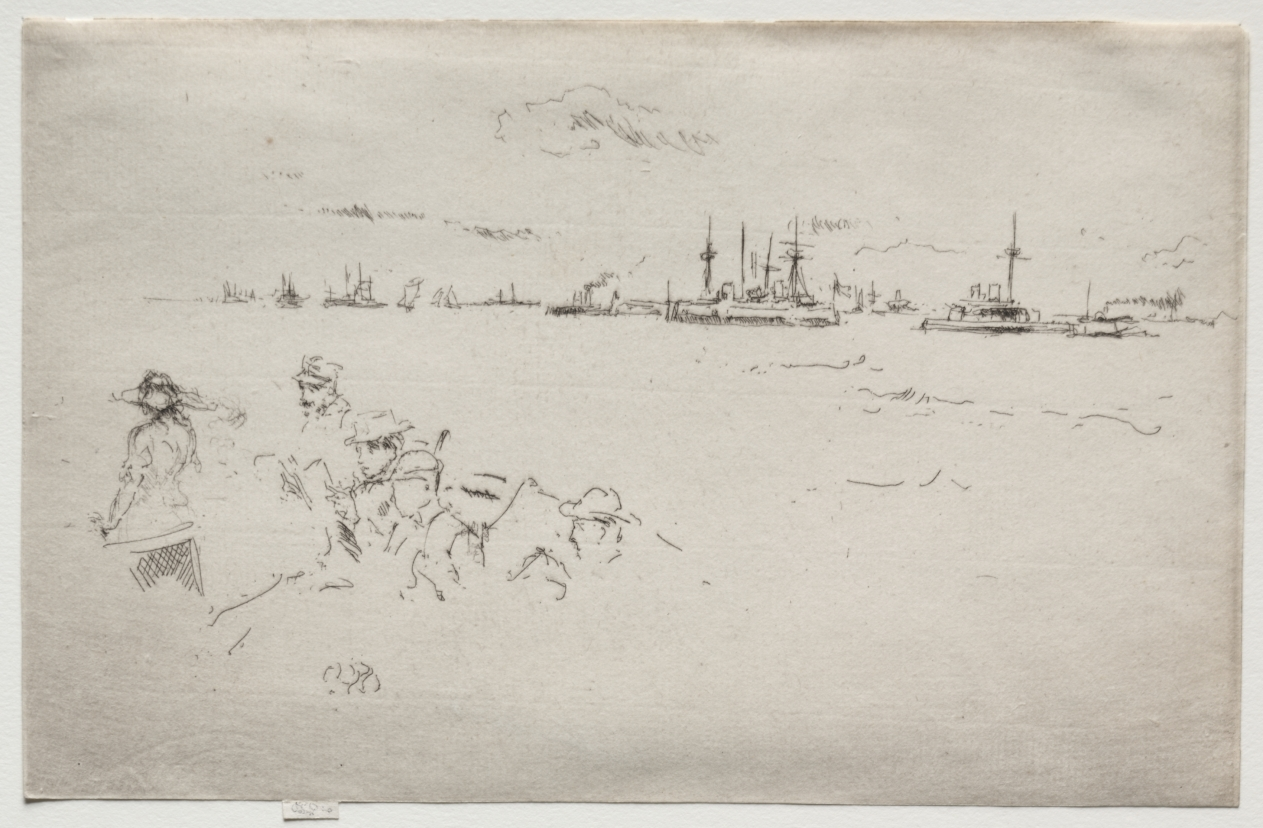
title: The Fleet: Monitors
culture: America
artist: James McNeill Whistler (American, 1834–1903)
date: 1887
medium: etching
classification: Print